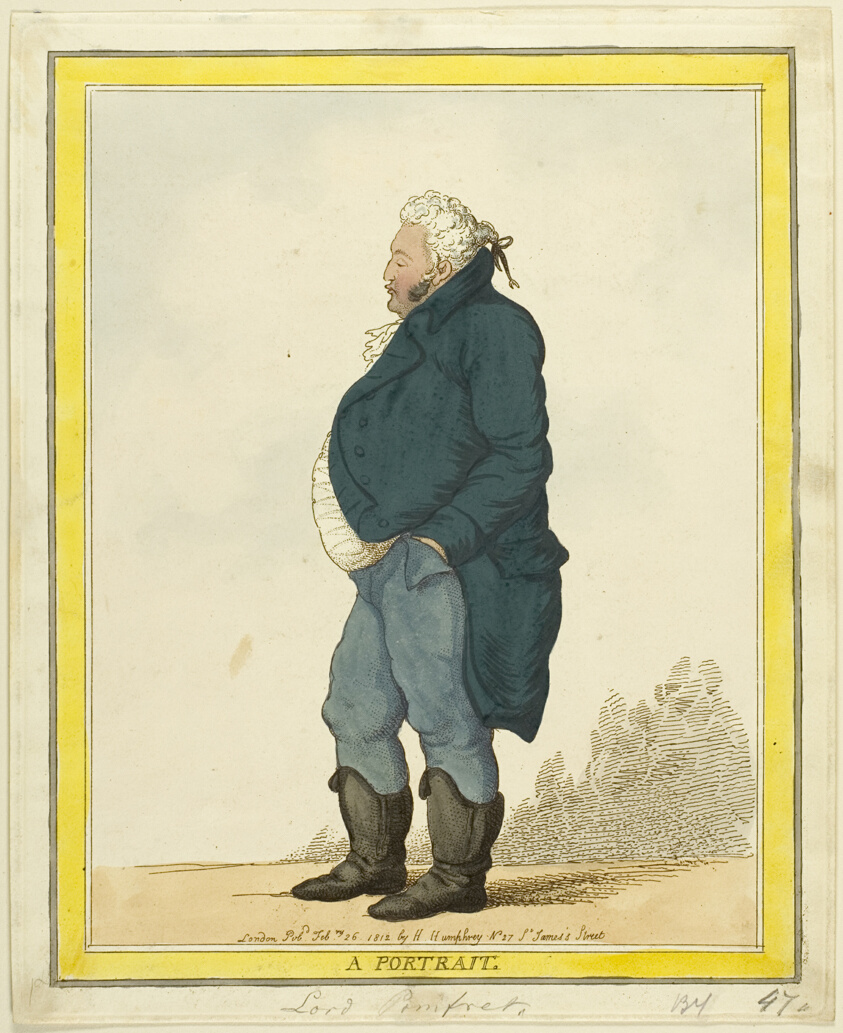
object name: Print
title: A Portrait: Lord Pomfret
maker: Thomas Rowlandson (English, 1756-1827); published by Hannah Humphrey (English, 1745-1818) and Thomas Tegg (English, 1776-1845)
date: published February 26, 1812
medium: Hand-colored etching on ivory wove paper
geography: England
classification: etching; print; prints and drawing